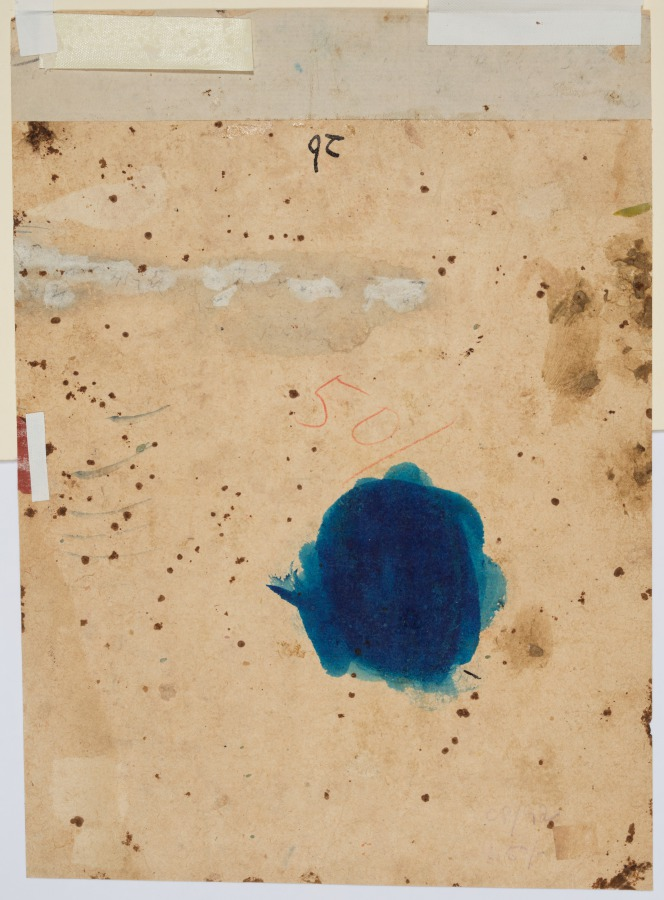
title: Maharana Sangram Singh II (r. 1710–34) Worshipping a Linga Under a Banyan Tree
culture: Northwestern India, Rajasthan, Rajput Kingdom of Mewar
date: c. 1712–15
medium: Gum tempera, ink, and gold on paper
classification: Painting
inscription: śrī mahāranā jī śri sangram sīgha jī badalā rābhāe (?)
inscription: 18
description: Shrines alongside bodies of water were associated with serpent deities. A four-headed snake painted gold is wrapped around the linga (the phallic emblem marking the sacred presence of the god Shiva). Facing the linga is a marble image of Shiva’s mount, the bull Nandi. Flowers, packets of paan (areca nut and sweet aromatics wrapped in betel leaf), coconuts, and a flower garland are among the offerings. A brass ewer holds purified water, and a bell would punctuate moments of recitation. A blue-and-white porcelain cup holds the fragrant yellow paste to be applied to the linga and the forehead of the pious king.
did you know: A miniature sculpture of Nandi, the bull mount of Shiva, is next to the king on the terrace.